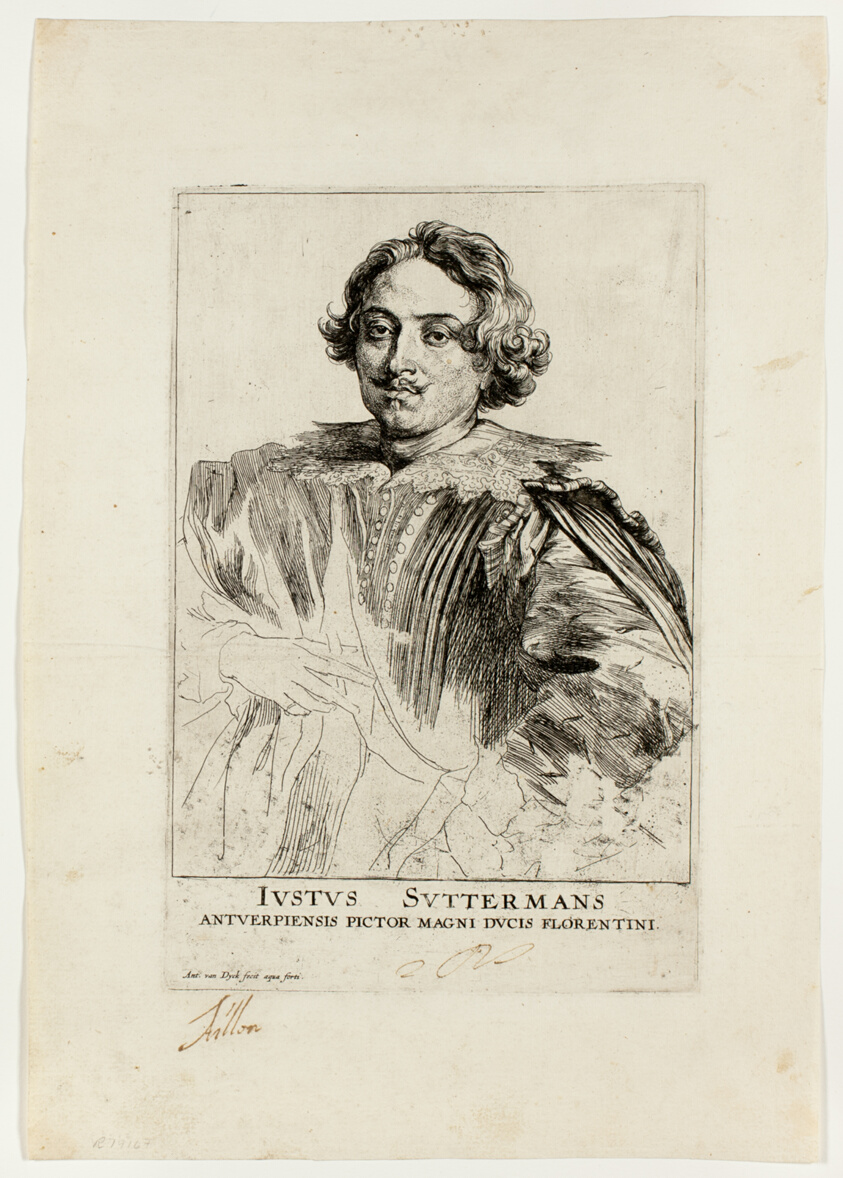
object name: Print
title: Justus Suttermans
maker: Anthony van Dyck (Flemish, 1599-1641)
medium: Etching and engraving in black on ivory laid paper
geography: Flanders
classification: etching; print; prints and drawing